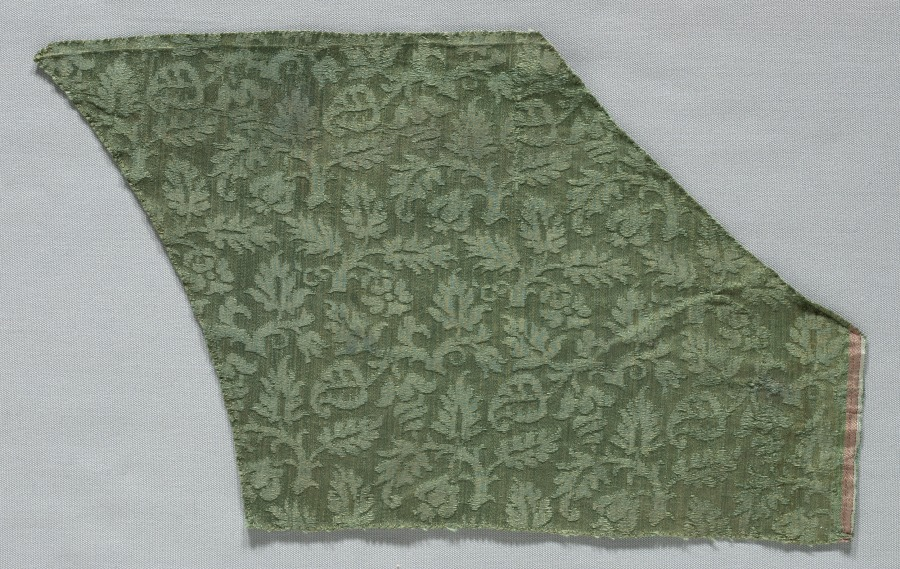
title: Silk Damask Fragments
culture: Italy, 16th century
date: 1500s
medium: damask, silk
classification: Textile